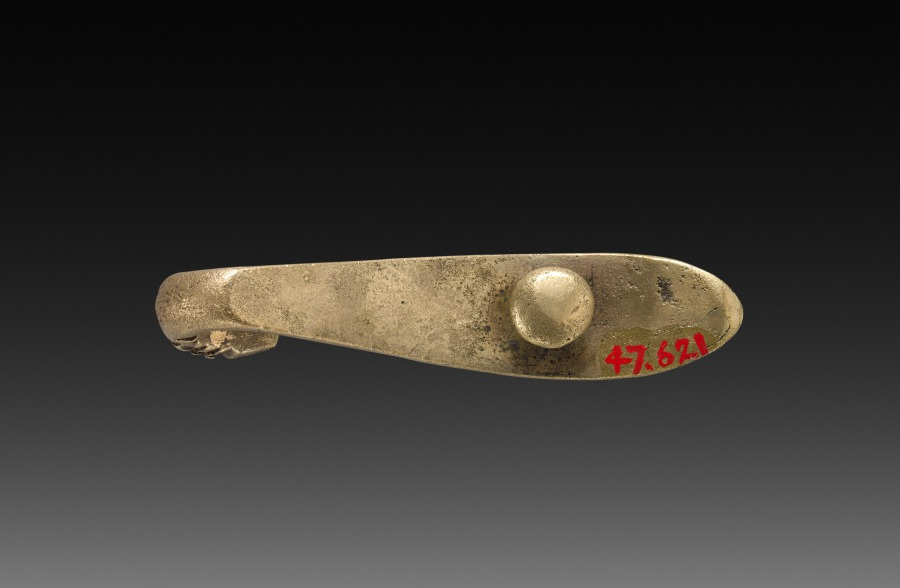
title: Buckle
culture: China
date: 1900s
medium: bronze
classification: Jewelry